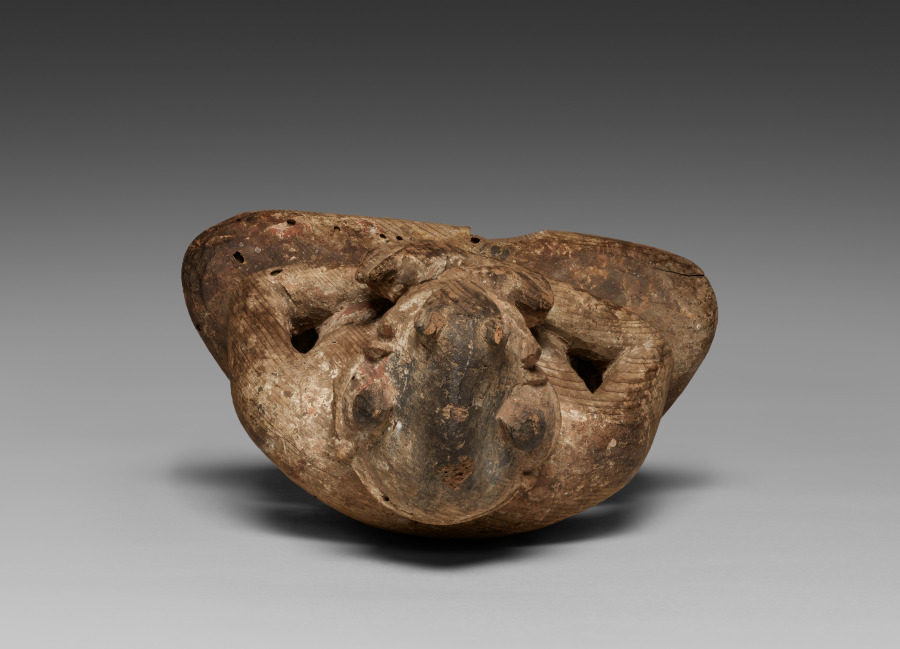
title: Gozu Tennō (Ox-Headed Plague Deity)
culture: Japan, Heian period (794–1185)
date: 1100s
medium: Wood with traces of color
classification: Sculpture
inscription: Object has wood storage box made and inscribed by former owner, sculptor Hirakushi Denchū (1872–1979). Inscription on face of box lid reads: Gozu Tennō sonzō (sculpture of Gozu Tennō [Ox-Headed Deity of Plague] 牛頭天王尊像); inscription on inside of box lid reads: made in the latter part of the Heian period, respectfully inscribed by Hirakushi Denchū [age] 99, February 1970 (平安朝後期作昭和四十五年二月 九十九 平櫛田中 拝題）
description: Gozu Tennō is a deity who is capable of both bringing epidemics and dispelling them. His name is literally “Ox-Headed Celestial King.” He usually has three heads with an ox-head rising above his primary face. He sometimes holds a lasso and sword or an ax, but here holds his hands in a powerful gesture that may be designed to repel illness or promote healing.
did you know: The Gion Festival in Kyoto is related to belief in Gozu Tennō.